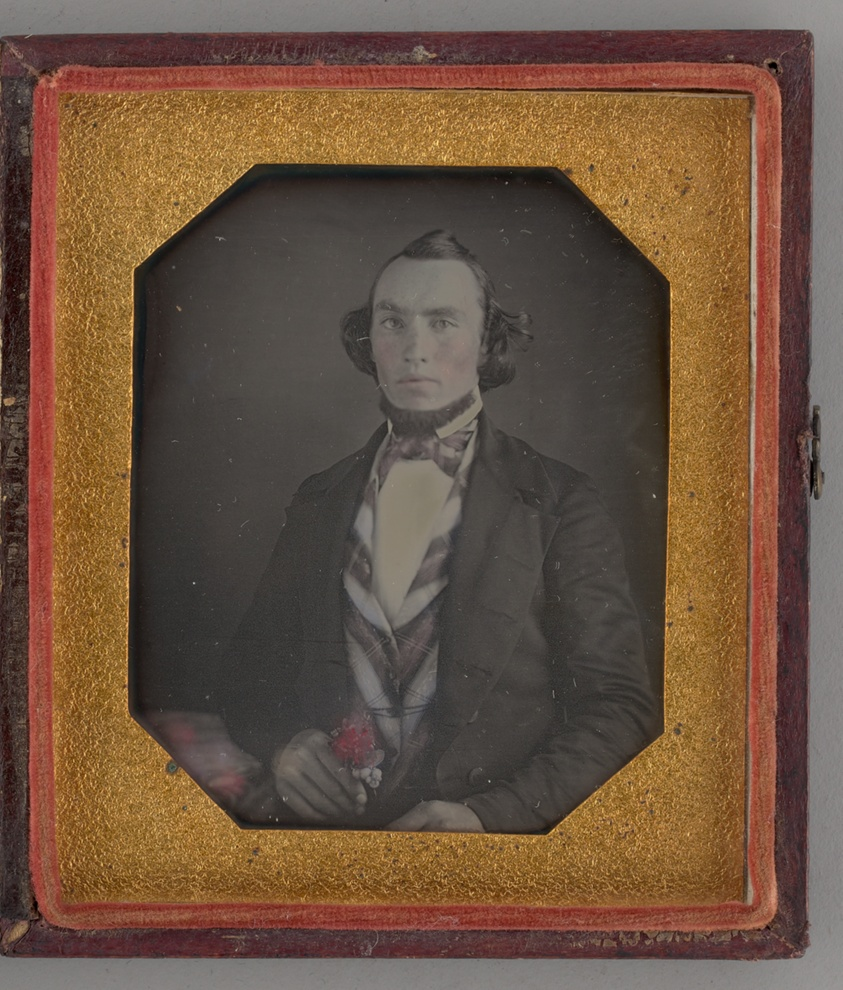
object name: Photograph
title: Untitled (Portrait of a Man)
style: 19th century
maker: Unknown maker; American, 19th century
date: 1845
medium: Daguerreotype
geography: United States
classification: portrait; photograph; photographic process; photography; portrait; daguerreotype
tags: lundberg collection, portraits, portraits: male subject, men, Male, portrait